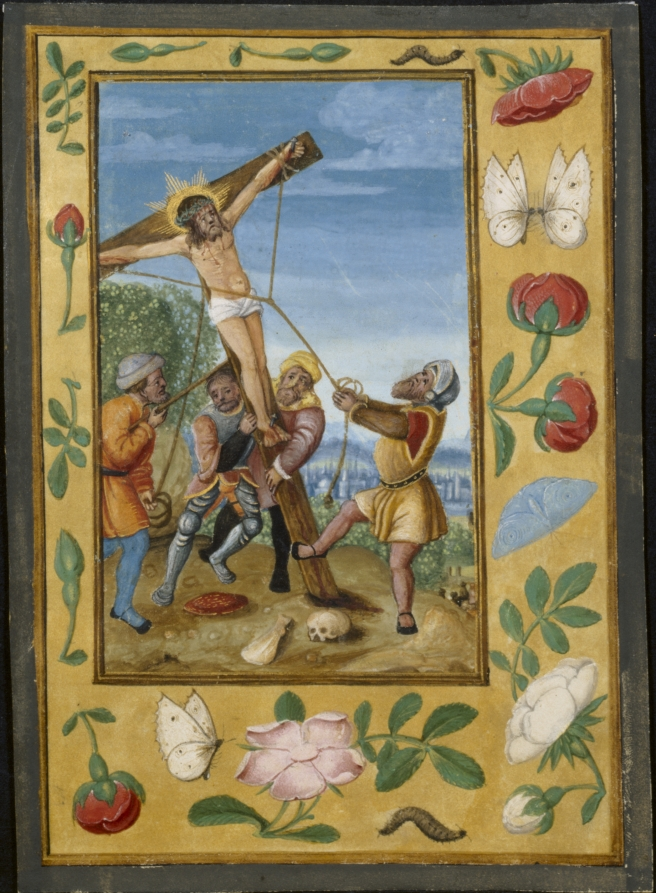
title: Leaf from a Book of Hours: The Raising of the Cross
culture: Germany, Nuremberg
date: c. 1510–20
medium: tempera and liquid gold on vellum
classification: Manuscript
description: This finely painted miniature is the work of an artist familiar with the designs of Albrecht Dürer (1471–1528). Though not deriving from a known engraving or drawing, the style, composition, and especially the modeling of the figure of Christ refer to the draftsmanship and tonalities found in Dürer's works. This miniature depicts the moment the cross is raised. In the foreground, thuggish brutes struggle to bring it upright. The skull of Adam at the foot of the cross signifies that Golgotha was Adam's burial place. In the background, a vivid blue sky recedes into pink as it meets the horizon and a distant town. The inclusion of an illusionistic, trompe l'oeil border, strewn with flowers and butterflies on a gold ground, follows the tradition of Ghent and Bruges, where such borders were first developed during the 1470s and 1480s.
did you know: Books of hours were devotional books popular in the Middle Ages and meant for laypeople, or those not in the clergy.